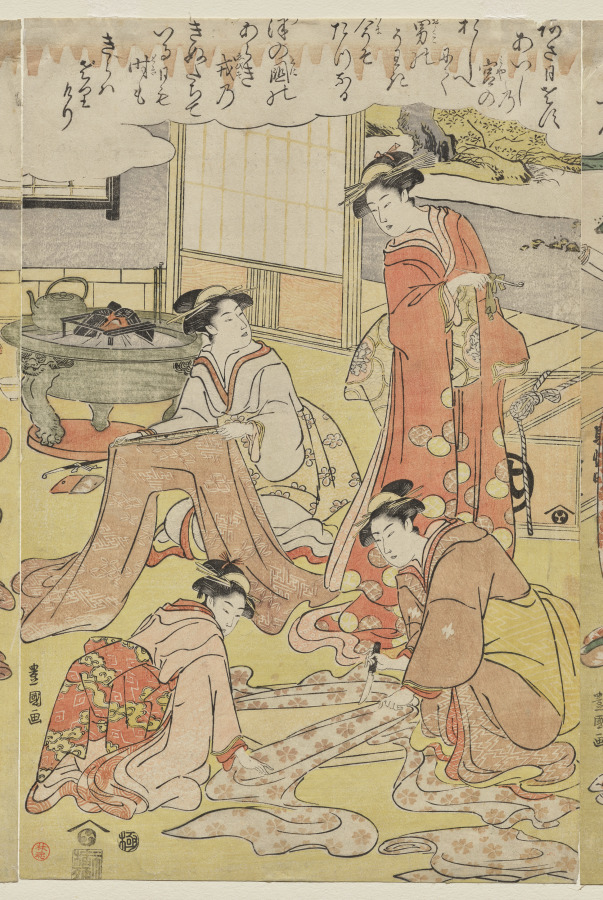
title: Women Making Clothing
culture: Japan, Edo period (1615–1868)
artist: Utagawa Toyokuni (Japanese, 1769–1825)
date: early 1790s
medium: color woodblock print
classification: Print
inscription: Signature: Toyokuni ga Publisher: Nishimuraya Yohachi (Eiju han, emblem) Censorship Seal: kiwame